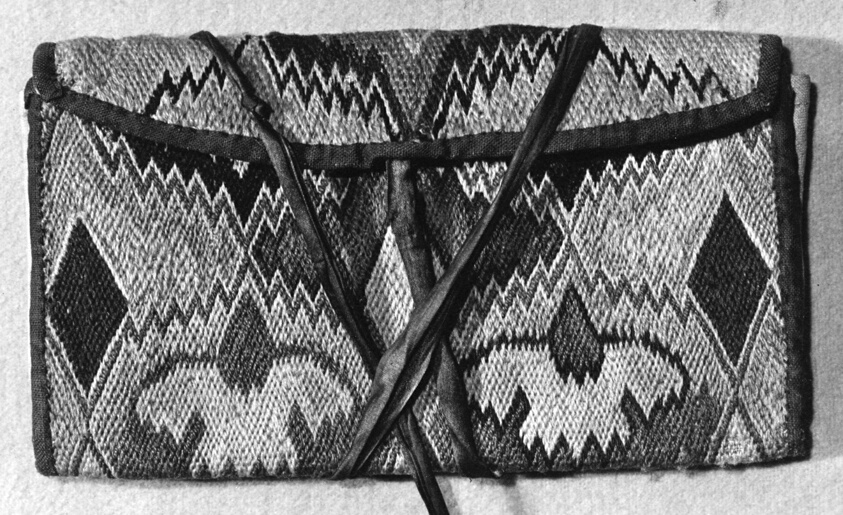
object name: Costume and Accessories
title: Purse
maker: Italy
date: 17th century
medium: Linen, plain weave; embroidered with wool in Florentine stitch; ribbon: silk, satin weave; edging: linen, plain weave; lining: linen, plain weave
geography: Italy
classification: textile; bag - needlework; costume accessory - bag; costume accessory; costume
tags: fashion